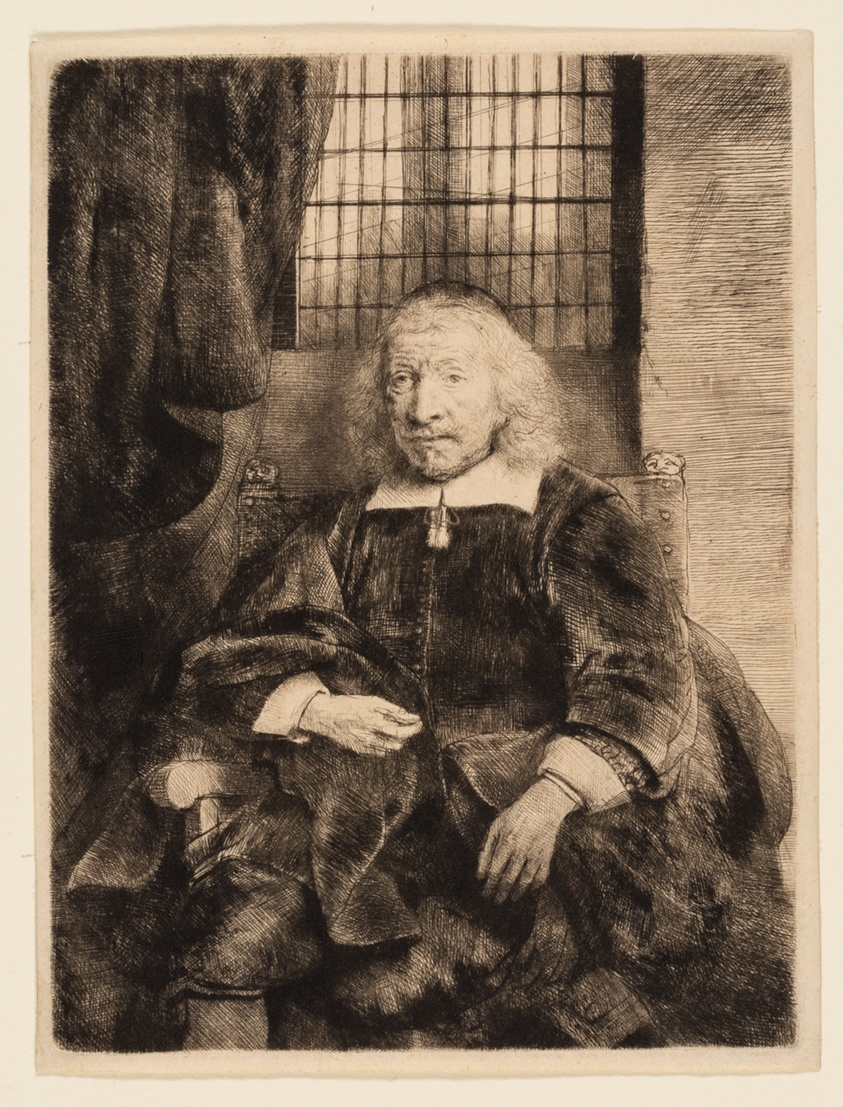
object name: Print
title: Thomas Haaringh (Old Haaringh)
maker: Rembrandt van Rijn (Dutch, 1606-1669)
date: c. 1655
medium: Etching and drypoint on paper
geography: Holland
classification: etching; print; prints and drawing; paper; drypoint